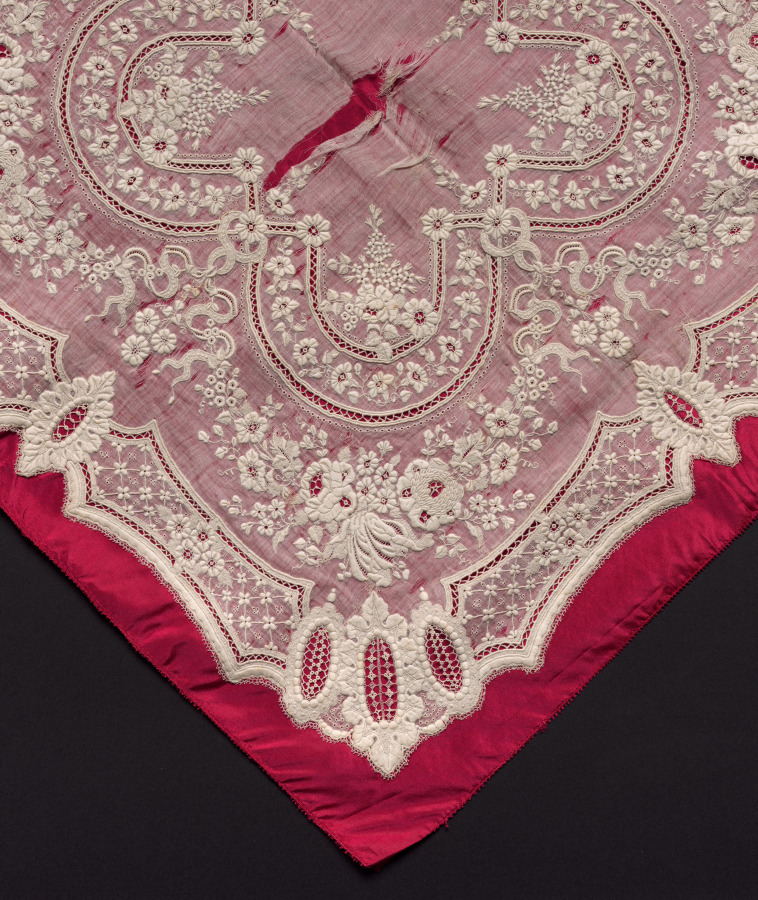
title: Handkerchief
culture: France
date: 1800s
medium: Plain weave linen: embroidered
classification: Embroidery